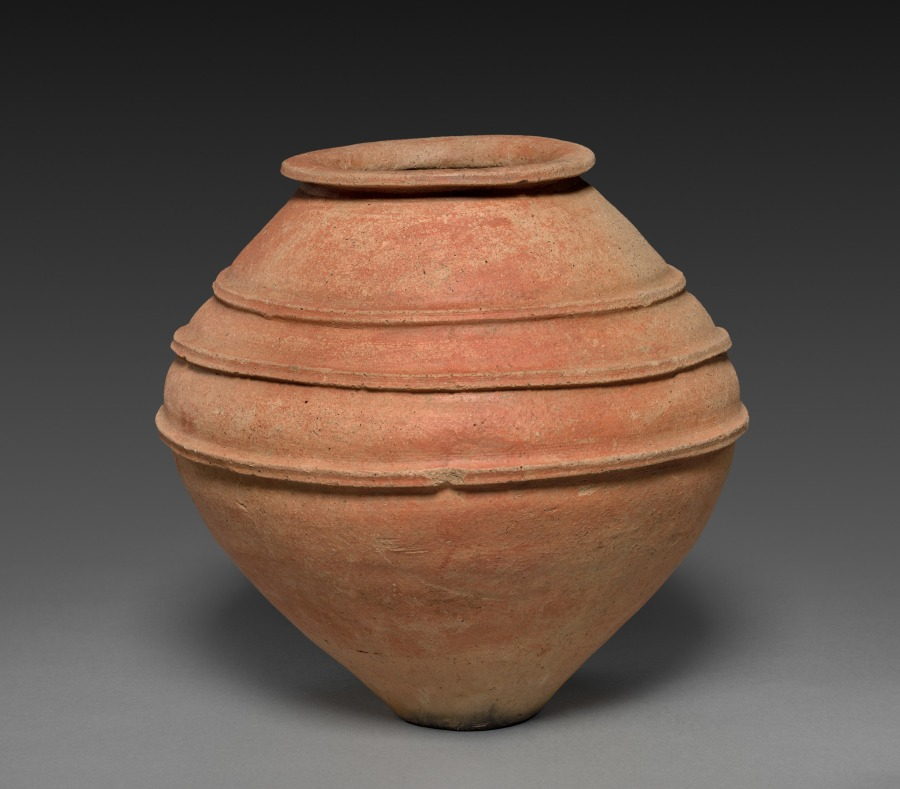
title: Jar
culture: Japan, Yayoi period (c. 300 BCE–300 CE)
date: c. 100 BCE–100 CE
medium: burnished earthenware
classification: Ceramic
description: The banding around this jar’s upper portion is an unusual feature for Yayoi pottery, which usually has a flat surface. It was likely made in western Japan, between Seto in Aichi prefecture and Kyushu, the southernmost main island. It is not believed to be a cooking vessel, but may have been used for storage. The ash spots occurred naturally during firing.